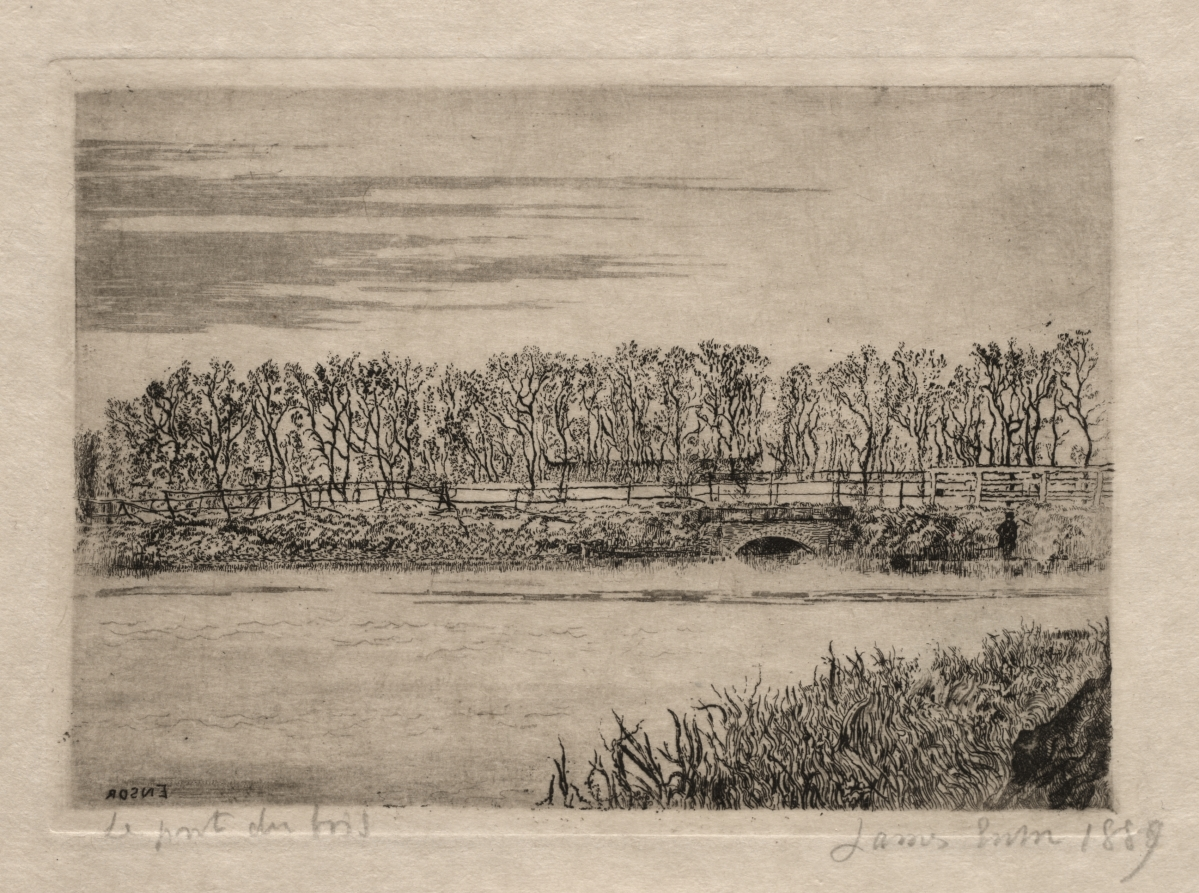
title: The Wood Bridge, Ostend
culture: Belgium, 19th century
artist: James Ensor (Belgian, 1860–1949)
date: 1889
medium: etching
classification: Print